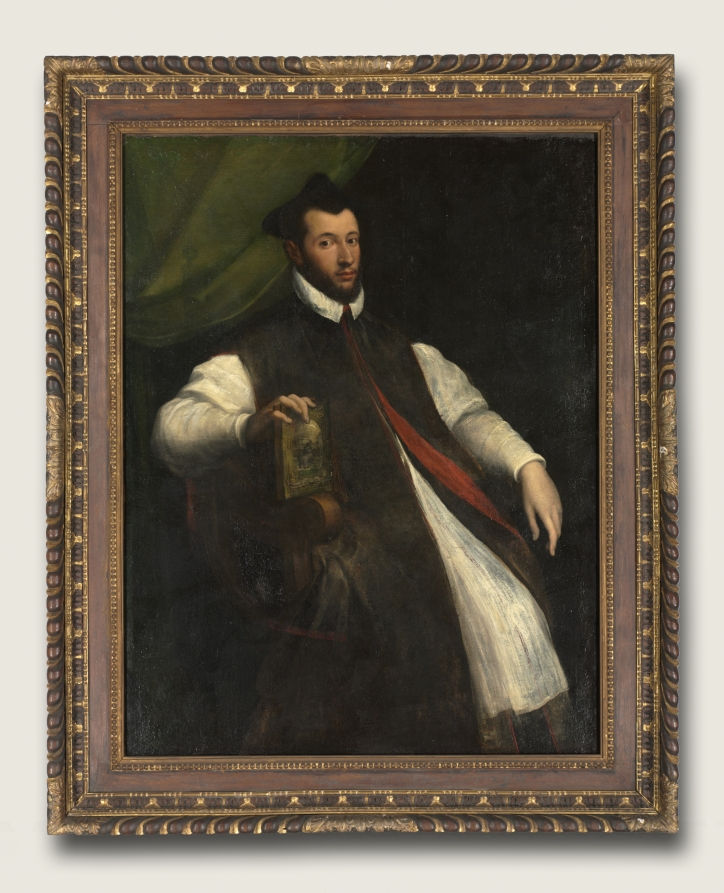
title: Portrait of a Prelate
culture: Italy, 16th century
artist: Girolamo da Carpi (Italian, c. 1501–1556)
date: mid-1500s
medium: oil on canvas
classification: Painting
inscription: Inscription on book: MUNDOS LIBENTER ASPICIT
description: Girolamo da Carpi, a court artist from Ferrara, was influenced by the grace and intellectual artificiality found in Italian Mannerist art, seen in the flowing S-curve of the sitter's clothing and his delicate and attenuated fingers. The sitter's dress identifies him as a prelate, a high-ranking member of the Catholic clergy. His costume includes a dark mantel with red lining over a gauzy, white rochet and the three-cornered hat, called a biretta. In his right hand he holds a book whose cover displays an elephant, standing in water, looking at the moon. This motif symbolized purity, and the sitter's virtue is further emphasized through the book's inscription, MUNDOS LIBENTER ASPICIT, which means, "The moon beholds the pure with pleasure." While several noble Renaissance households used this design for their family emblems, none have yet proven related to the prelate in this painting and so his identity remains unknown.